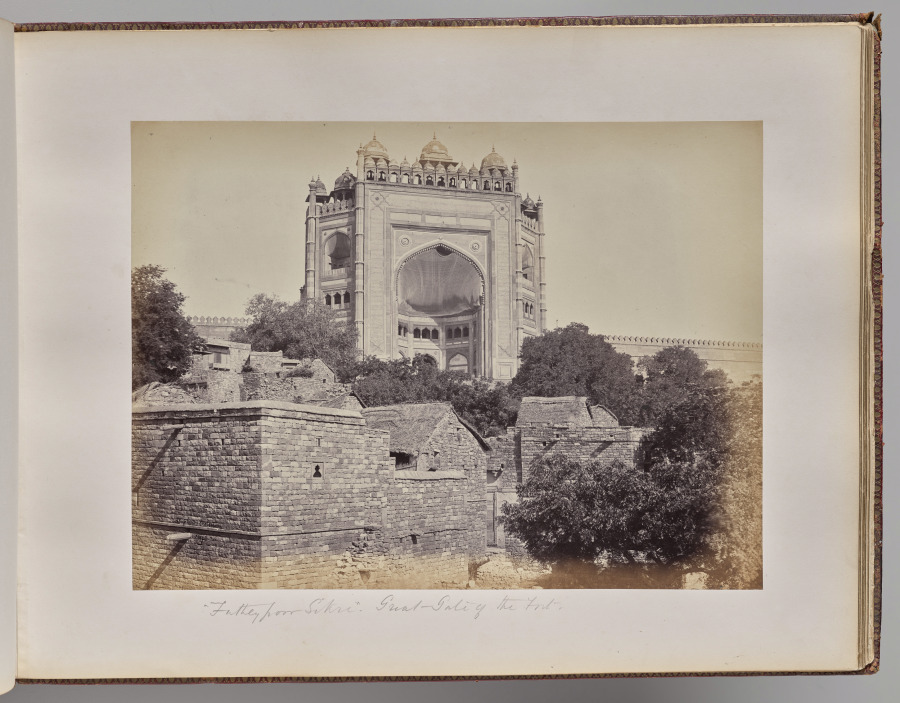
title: Futheypoor Sikre Guard Gate of the Fort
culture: England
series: Photographs of Northern India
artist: Samuel Bourne (British, 1834–1912)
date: 1863–70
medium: albumen print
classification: Photograph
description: The 50 images in this album, all taken in the 1860s, move from the hill towns of the Himalayas down to cities including Lahore (now in Pakistan), Delhi, Lucknow, Agra, Benares (now Varansi), and Calcutta (now Kolkata). Architectural studies of major monuments offer valuable historical records of what sites such as the Taj Mahal and the imperial mosque of the Mughal emperors in Delhi looked like before 20th-century restorations.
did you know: Samuel Bourne, the author of most the images in this album, was a banker in England before he moved to India to become a professional photographer.